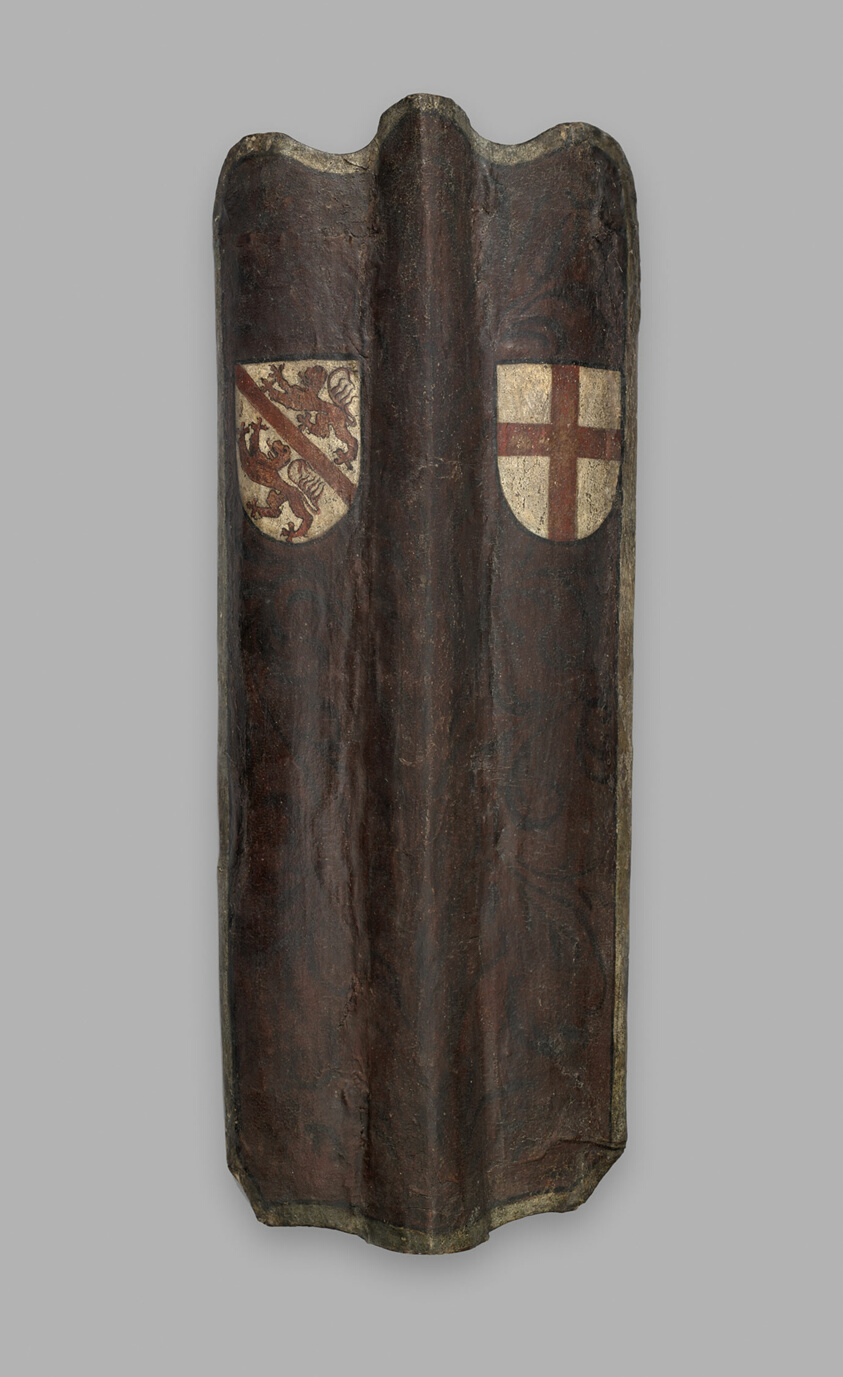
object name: Armor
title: Pavise with the Arms of Winterthur and Saint George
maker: Swiss; Winterthur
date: c. 1440—c.1460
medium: Wood, leather, pigskin, iron, gesso, and pigment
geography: Winterthur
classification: shield; armor; arms and armor